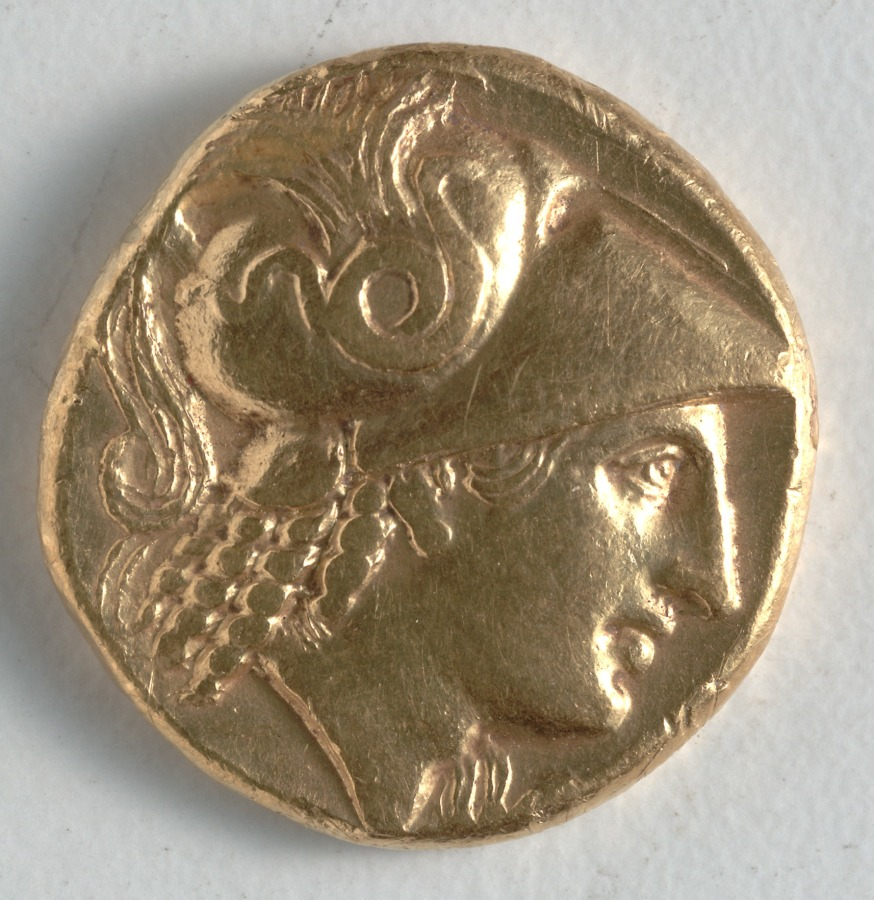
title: Stater: Head of Athena (obverse); Nike (reverse)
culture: Greek, Macedonian, minted at Abydos (Mysia), reign of Philip III Arrhidaios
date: 323–317 BCE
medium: gold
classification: Coins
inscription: ΦΙΛΙΠΠΟΥ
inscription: - within M